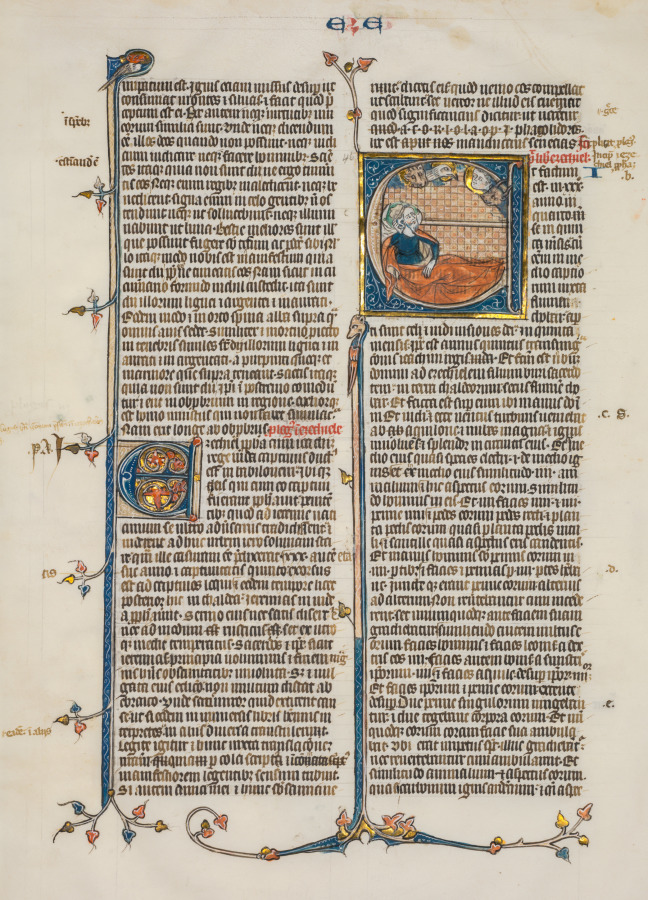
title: Bifolium from a Bible: Initial E[t factum est] with Ezekiel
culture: France, Paris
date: c. 1290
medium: ink, tempera, and gold on vellum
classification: Manuscript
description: This large initial E on the left page introduces the Book of Ezekiel. The prophet is represented in the midst of his apocalyptic visions. Ezekiel's call to prophecy began as a vision showing God enthroned among four creatures, each with four wings and the face of a man, lion, ox, and eagle, respectively. These apocalyptic beasts recur in the Book of Revelation and were developed by the medieval Church into symbols of the Evangelists: Matthew, Mark, Luke, and John. Since medieval manuscripts were not paginated, this large initial provided a clear visual cue for the reader to help locate the text of Ezekiel within the manuscript.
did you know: This bifolium was likely once part of a Carthusian Bible; the initials in the margin are part of a unique reading system used by Carthusian monks.